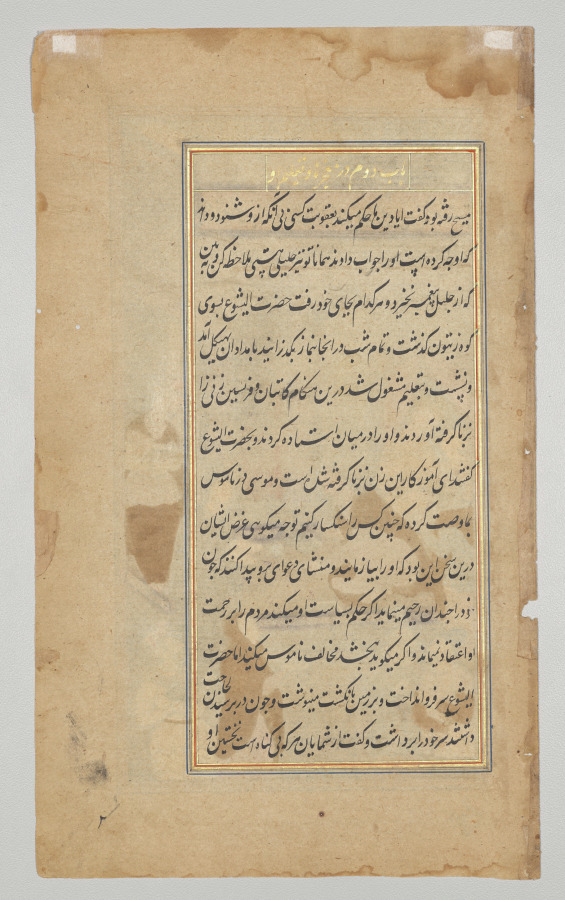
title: Text page from a Mirror of Holiness (Mir’at al-quds) of Father Jerome Xavier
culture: Mughal India, Allahabad, made for Prince Salim (1569–1627)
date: 1602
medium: Ink and gold on paper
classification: Manuscript